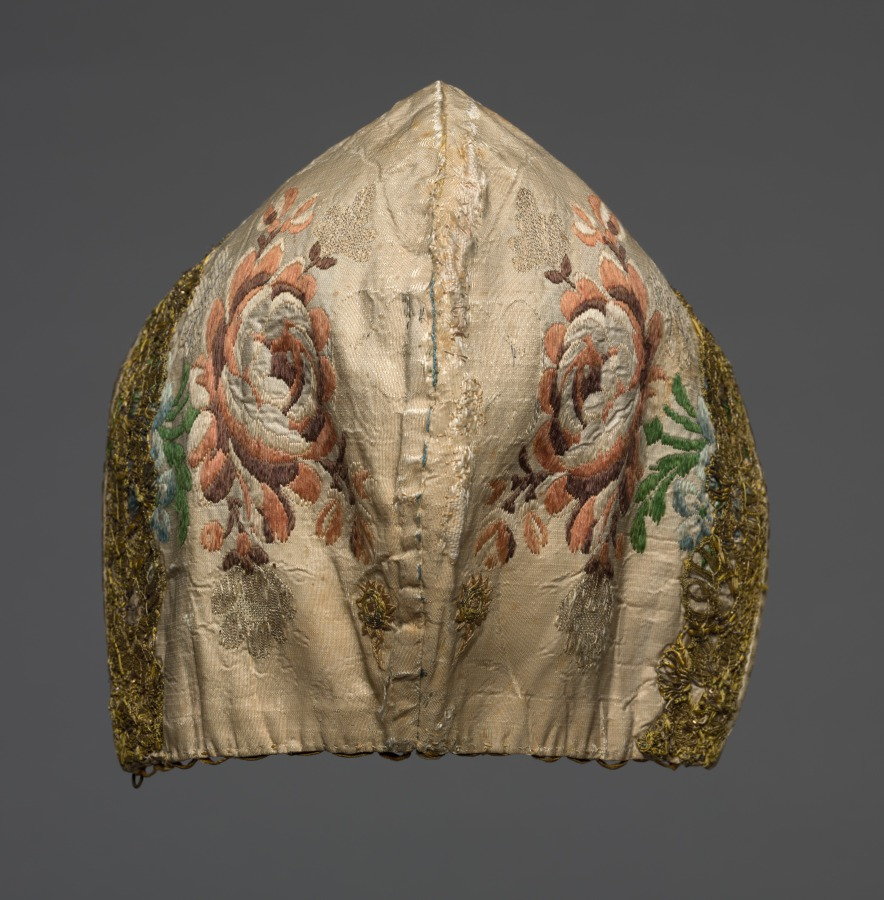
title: Cap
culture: France, Strasbourg, mid-18th century, Period of Louis XV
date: mid 1700s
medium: corded silk damask and metallic thread, edge embroidered with gold lace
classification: Garment